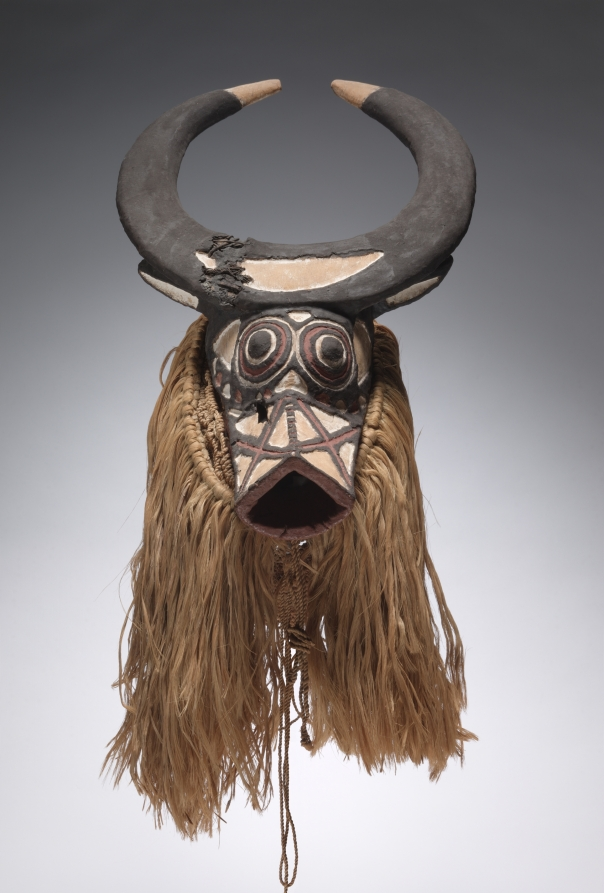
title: Buffalo Mask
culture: Africa, West Africa, Burkina Faso, possibly Bwa-style maker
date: early to mid-1900s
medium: Wood, plant fibers, paint, and iron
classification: Mask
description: Among the Bwa people, masks with human, animal, and fantastic traits typically represent protective bush spirits. This mask’s horns and muzzle identify it as a bush buffalo. Masked dancers appear during the dry season for initiations, funerals of elders, market days, harvest celebrations, and annual renewal rituals to protect the well-being of the community.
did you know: Once broken, the right horn of this mask was repaired; this indicates that it was valued.